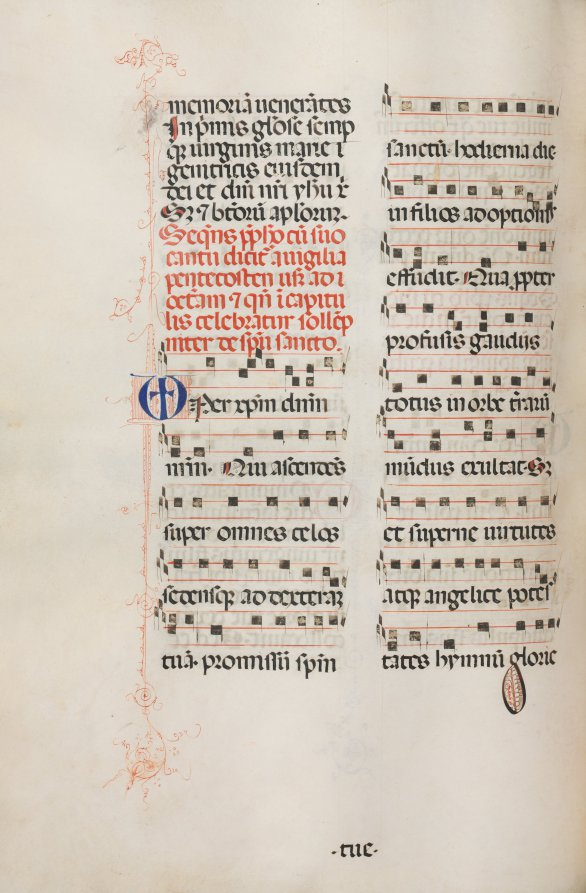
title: Missale: Fol. 180v: Music for various ordinary prayers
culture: Italy, Perugia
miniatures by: Bartolommeo Caporali (Italian, c. 1420–1503)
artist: assisted by Giapeco Caporali (Italian, d. 1478)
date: 1469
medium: ink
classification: Bound Volume